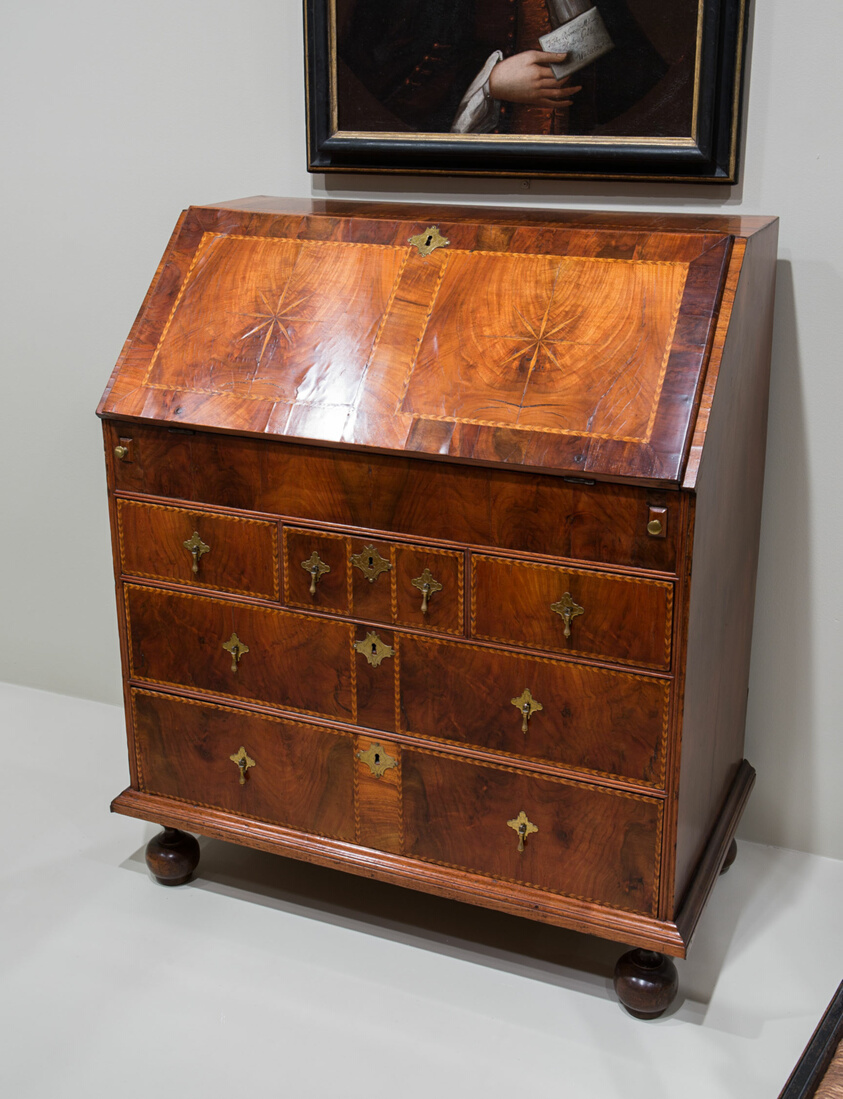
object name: Furniture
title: Desk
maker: Artist unknown (American, 18th century); Boston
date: 1700–35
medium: Walnut, walnut veneer, and white pine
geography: Boston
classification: desk; furniture; american decorative arts; american arts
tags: furniture